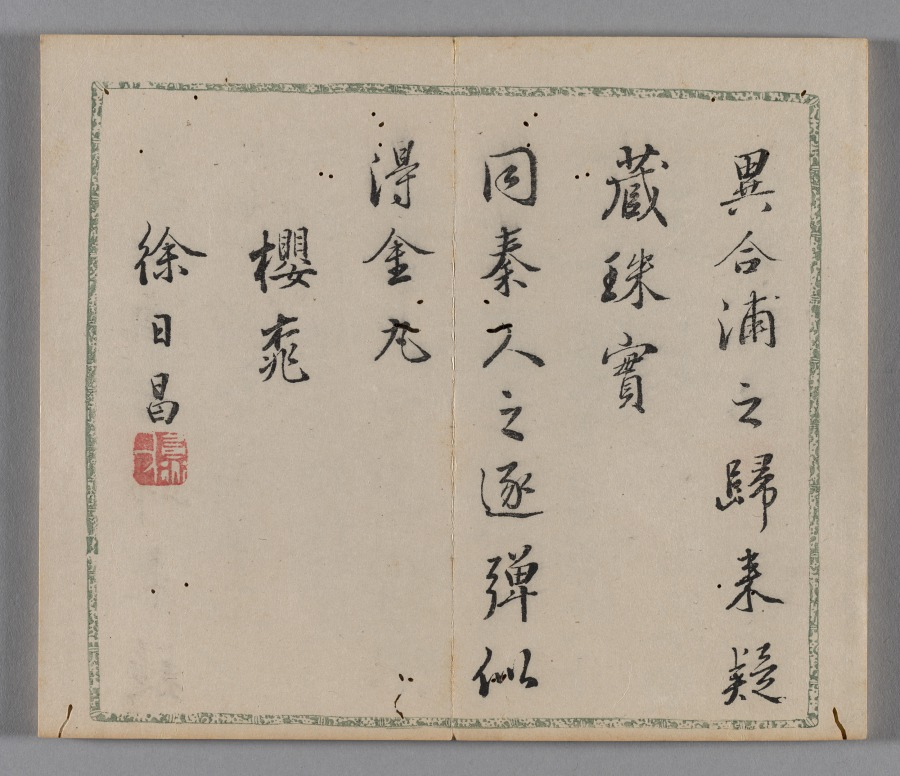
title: Ten Bamboo Studio Collection of Calligraphy and Painting: Round Fans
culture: China, Qing dynasty (1644-1911)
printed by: Hu Zhengyan (Chinese, c. 1584–1674)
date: 1633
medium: Woodblock-printed book; ink and colors on paper; first edition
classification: Print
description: Color printing reached a level of perfection in the early 1600s, as seen in this Ten Bamboo Studio Collection of Calligraphy and Painting and the Mustard Seed Garden Manual of Painting (printed 1679 and 1701). The painterly quality, precision in registering (aligning) the woodblocks, and harmonious colors made them the most successful color print editions in Chinese history. Both editions were printed and compiled in Nanjing, spread nationwide, and had a great impact on the arts in Japan and Korea.